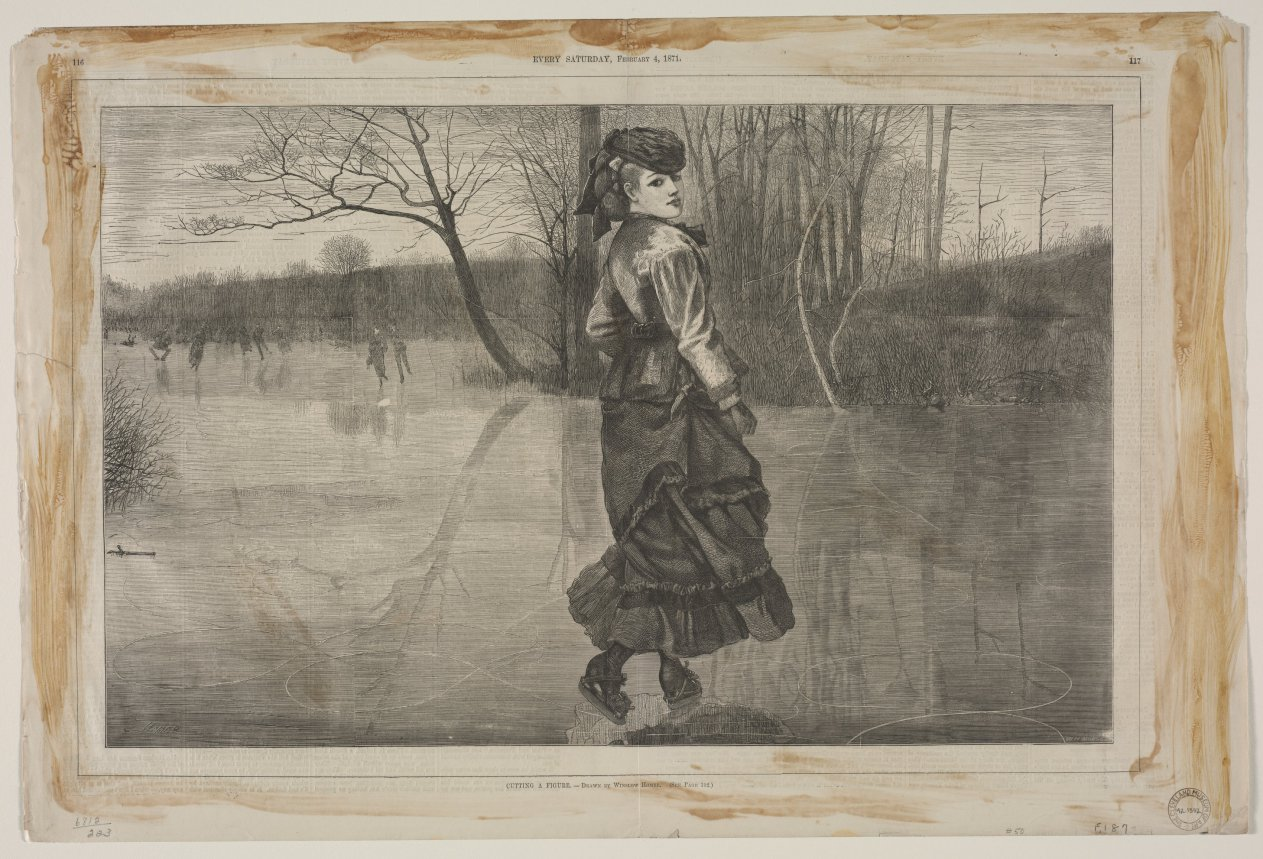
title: Cutting a Figure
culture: America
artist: Winslow Homer (American, 1836–1910)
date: 1871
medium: wood engraving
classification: Print